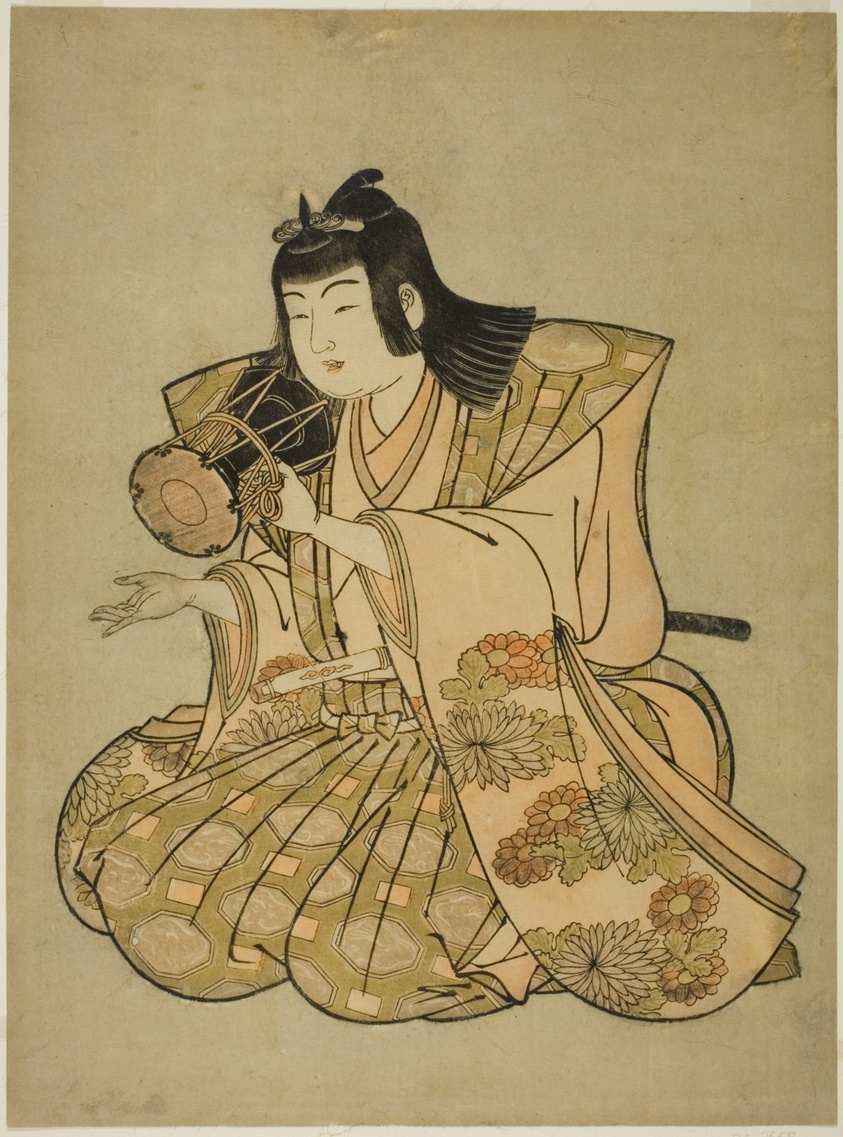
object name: Print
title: The Hand-Drum Player, from an untitled series of five musicians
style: Japanese (culture or style)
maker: Attributed to Kitao Shigemasa; Japanese, 1739-1820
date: 1780s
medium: Color woodblock print; oban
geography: Japan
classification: woodblock print; print; asian art